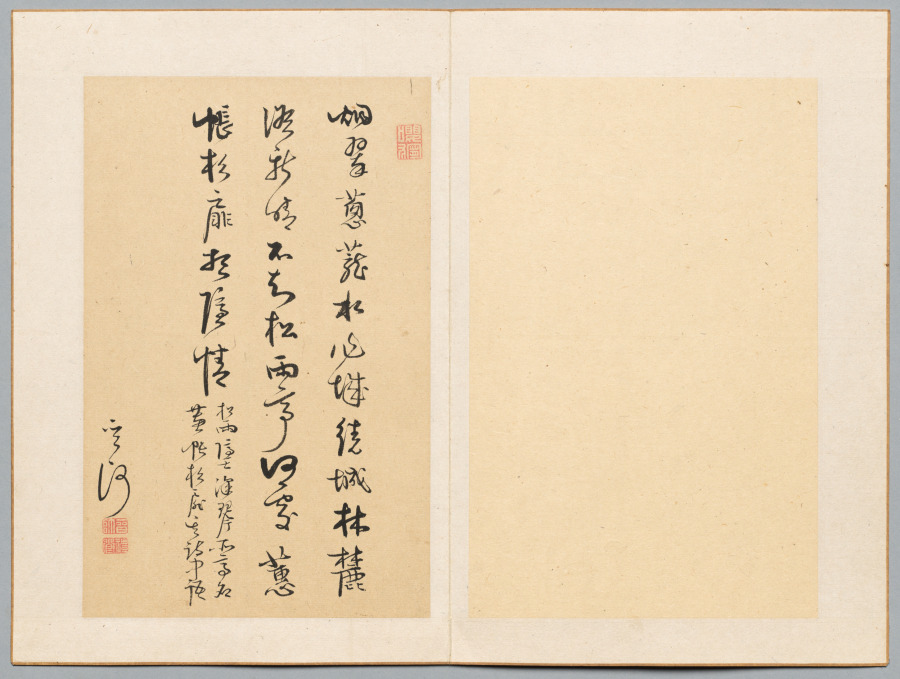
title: Calligraphy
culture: Japan, Edo period (1615–1868)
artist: Kan Sazan (Japanese, 1748–1827)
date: early to mid-1800s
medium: leaf from a pair of albums; ink and light color on paper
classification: Portfolio